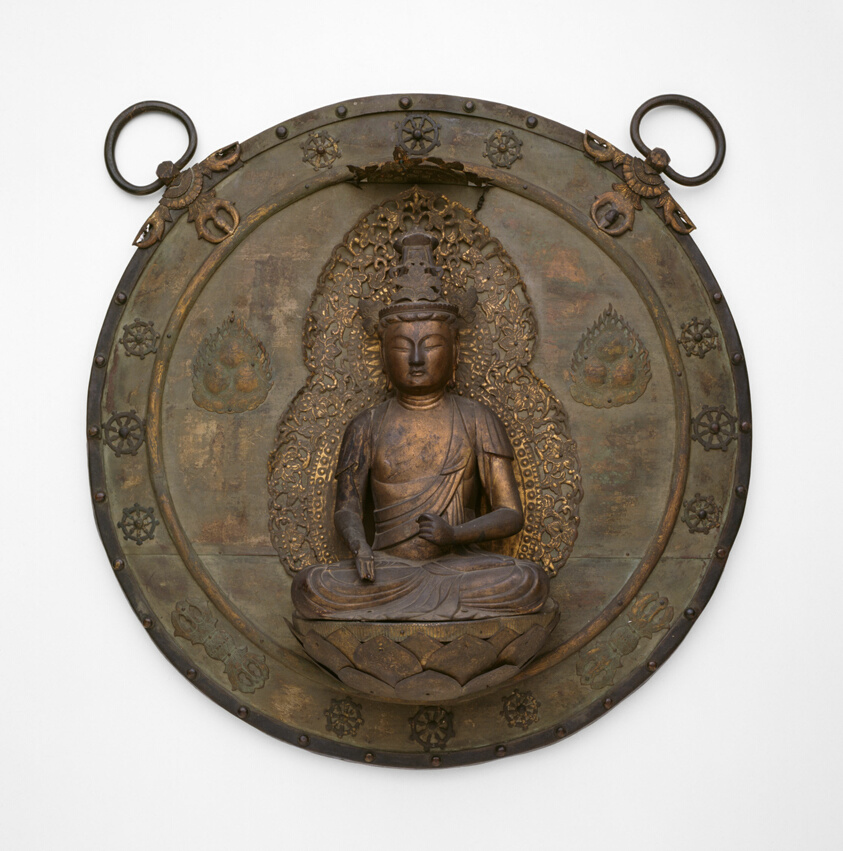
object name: Sculpture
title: Icon Plaque (Kakebotoke) with Bosatsu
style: Japanese (culture or style)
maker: Japan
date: 13th century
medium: Wood and bronze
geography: Japan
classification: wood; sculpture; asian art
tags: Buddhism, religion